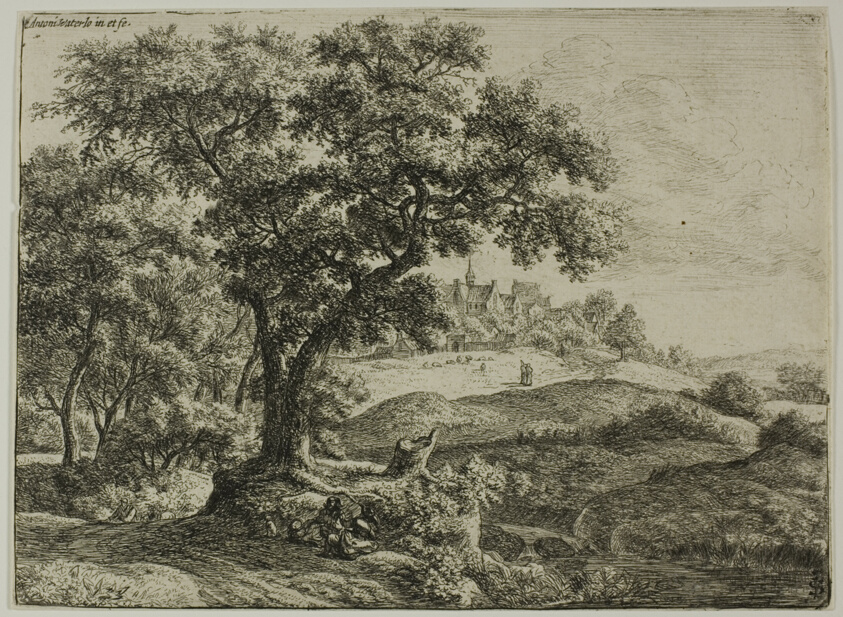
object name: Print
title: The Edge of the Forest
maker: Anthonie Waterloo (Dutch, c. 1610-1690)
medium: Etching on paper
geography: Holland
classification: etching; print; prints and drawing